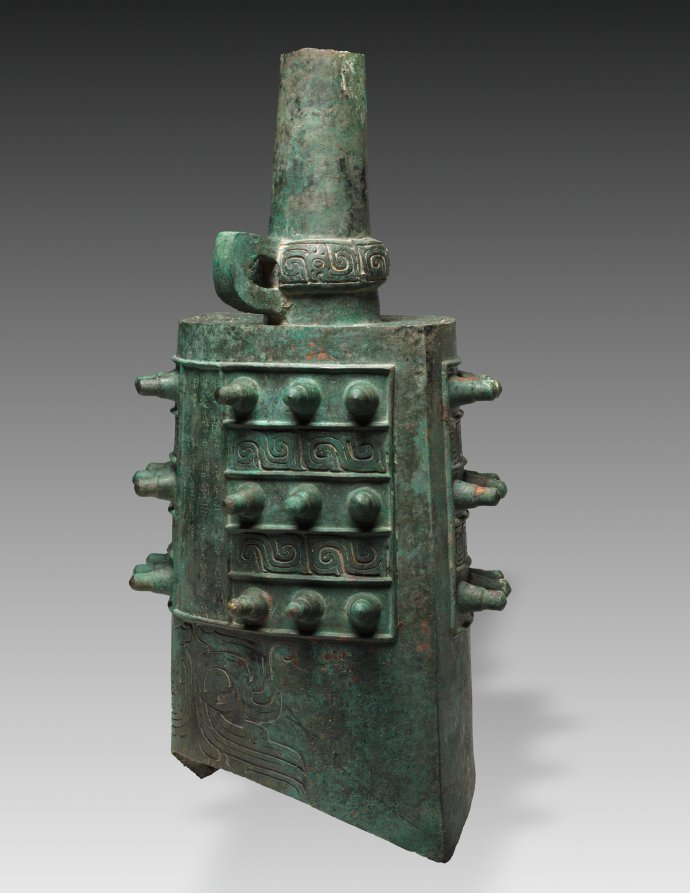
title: Bell (Lai Zhong)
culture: China, Shaanxi province, Meixian, Western Zhou dynasty (c. 1046–771 BCE)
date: c. 800–700 BCE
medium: bronze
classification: Metalwork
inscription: Lai proclaimed: "Great and illustrious was my august late father who made his heart clean following the disciplined virtue of his forefathers and dutifully served the past king. I, Lai, now succeed him in service and dare not fail. Respectfully, from dawn to dusk I will earnestly--even unto death--serve the Son of Heaven, taking as a model the obligation of my forefathers." I, Lai, was presented with many things. Then came the [king's] gracious command: "Manage the fisheries and forests of the realm." "I, Lai, dare to respond to the great, illustrious, sagely, and gracious favor of the Son of Heaven, extolling him and using this as cause to make for my august late father Gongshu a set of harmonized bells. Ding, dong, bing, bong, ding, dong, bing, bong. May they be used in acts of piety, reverently gladdening past luminaries. May the past luminaries who dwell on high help perpetuate this command, sending down upon me good fortune, tranquility, and purity. May I, Lai, live long in service to the Son of Heaven." May sons' sons and grandsons' grandsons forever treasure these [bells].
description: In ancient China, music and ritual had political significance and were linked inseparably to the power of states. During the Zhou dynasty, bronze bells were made in sets of eight to sixty bells. This bell is the second largest from a set of eight. This bell bears an inscription of 118 characters about its owner, Lai, and why it was cast. Lai's ancestors dutifully served the Western Zhou royal court, and he was granted a hereditary position by the "Son of Heaven" (the ruler). To express filial piety, Lai commissioned a set of bells as an offering to his father, Gongshu, in the hope that they would be forever treasured by future generations. This important inscription also provides an early example of Chinese calligraphy highlighting the purely abstract lines and construction of characters.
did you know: The technical sophistication of the unusual lens-shaped cavity allowed the bell to produce two different tones.